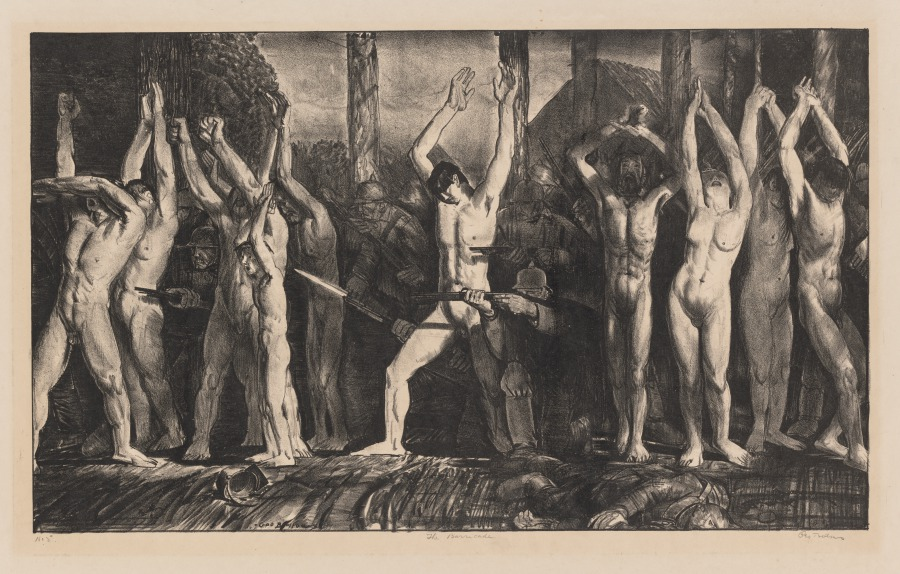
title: The Barricade, First Stone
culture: America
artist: George Bellows (American, 1882–1925)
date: 1918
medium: lithograph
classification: Print